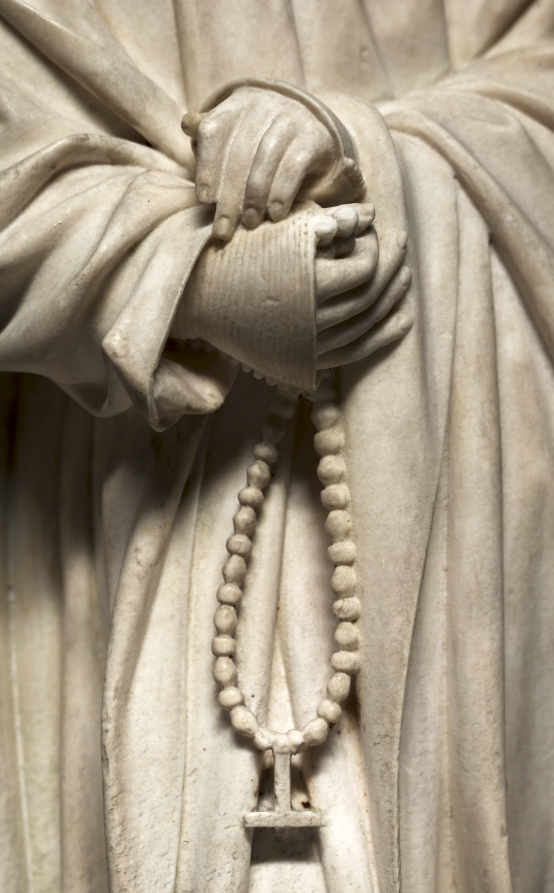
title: Mourner from the Tomb of Philip the Bold, Duke of Burgundy (1364–1404)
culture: Netherlands, active Dijon, 15th century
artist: Claus de Werve (Netherlandish, 1380–1439)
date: 1404–1410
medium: vizille alabaster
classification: Sculpture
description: This figure comes from the tomb of Duke Philip the Bold from the church of Champmol near Dijon (Burgundy, France). Philip, who founded the monastery and designated it as his burial place, hired the best artists, many of whom came from the Netherlands. While the commission was given in 1381, the work was not completed until 1410, six years after the duke’s death. This mourner is unusual for the time because it is not carved as a static low relief on the pedestal of the tomb but interacts with the viewers and their fellow procession members. The lifelike quality of the figure is due in large part to the alabaster. Its softness allowed artists to carve details into the material, and the transparent, milky white stone could also be polished to a high gloss.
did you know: During his life, Duke Philip founded the monastery of Chartreuse de Champmol to serve as a final resting place for himself and his family.